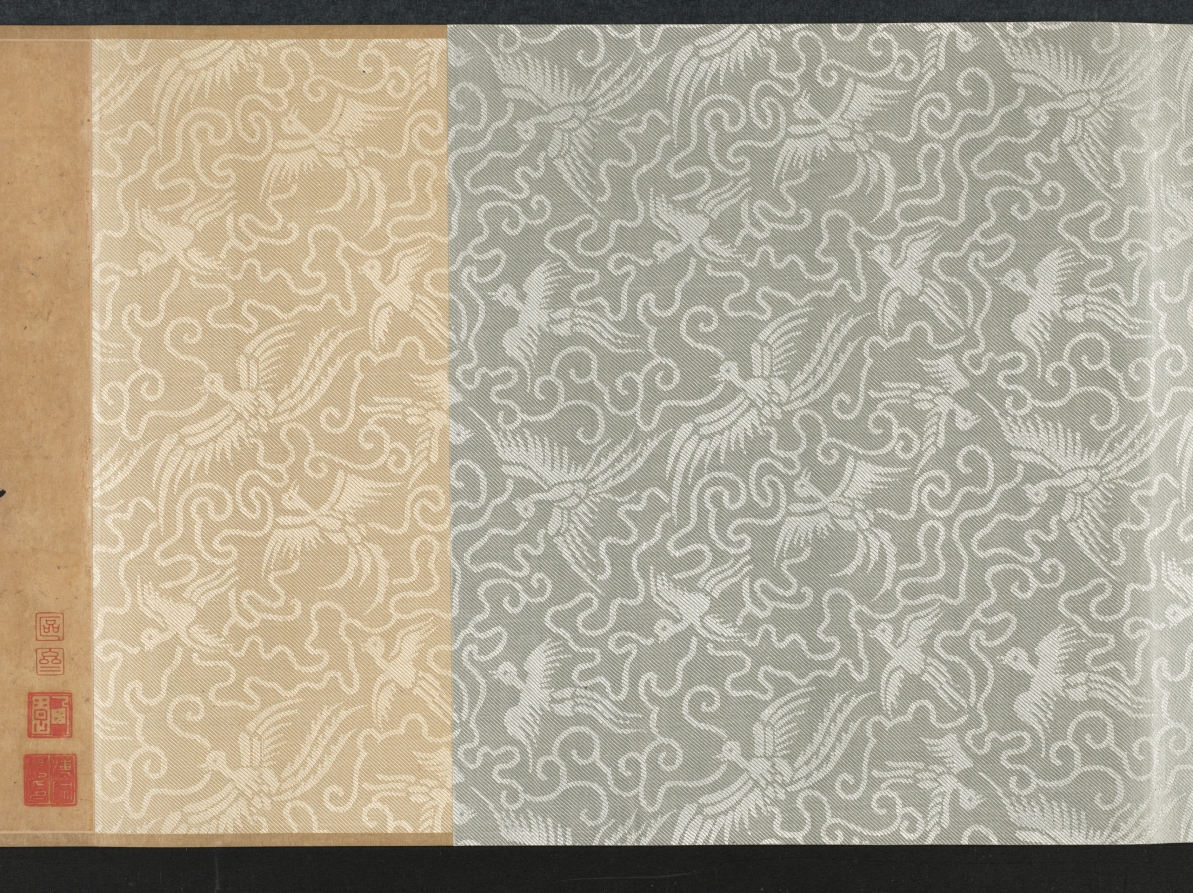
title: The Lantern Night Excursion of Zhong Kui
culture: China, Yuan dynasty (1271-1368)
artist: Yan Hui (Chinese, active 1270–1310)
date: late 1200s–early 1300s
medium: handscroll; ink and slight color on silk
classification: Painting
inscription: Artist's signature [and probable seal]: Yan Qiuyue 顏秋月 Title on frontispiece and 1 seal of Niu Shuyu 鈕樹玉 (1760–1827): Qiuyue mohuan 秋月墨幻 [Qiuyue's Ink Fantasy]. 31 additional seals: 2 of Yang Shiqi 楊士奇 (1365–1444); 2 of An Guo 安國 (1481–1534); 8 of Xiang Yuanbian 項元汴 (1525–1590); 2 of Geng Zhaozhong 耿昭忠 (1640–1686); 4 of Pu Tung 溥侗 (1870–1952); 7 of Tan Jing 譚敬 (1911–1991); 1 of Liu Ting-chih (20th c.); 5 unidentified.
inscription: An inscription by Zizhi Shanren 紫芝山人 [probably Jiang Hui 蔣惠], dated 1389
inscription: An inscription by Wu Kuan 吳寬 (1436–1504)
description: Here, the demon queller Zhong Kui leads a nightly procession of street entertainers with bare, muscular bodies and demonic faces. Some wear shabby clothes, and all perform stunts and tricks to astound and scare the viewer. In fact, a New Year custom in cities of southeast China had the poor, disguised as demons, process through the streets and play their tricks to clear households of evil spirits and welcome the spring. From right to left, a demonic figure leads the procession and beats a drum; another lifts a large rock; one stands on his hands trying to drink; one balances a jar on his elbow; three hold and wield weapons; one carries a folded chair covered by a cow’s skin; another holds Zhong Kui’s qin (zither), books, brush, and inkstone. At the end of the scroll, two figures offer a cup and bottle of wine to Zhong Kui, who lifts his hand in command.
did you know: Zhong Kui was an ancient ghostbuster.